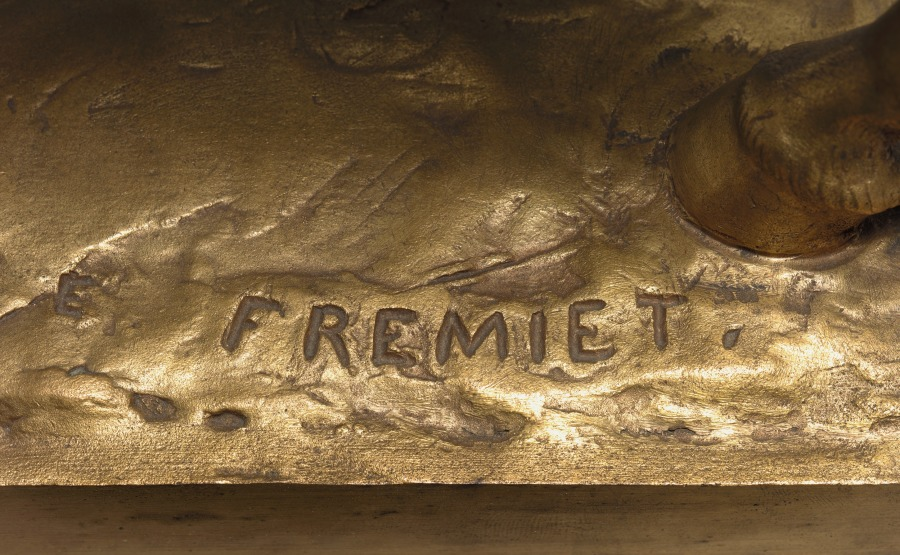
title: St. Joan of Arc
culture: France, 19th century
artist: Emmanuel Fremiet (French, 1824–1910)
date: 1874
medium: gilt bronze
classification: Sculpture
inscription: signed: "FREMIET"; inscription on flag: "IHS, MARIA."